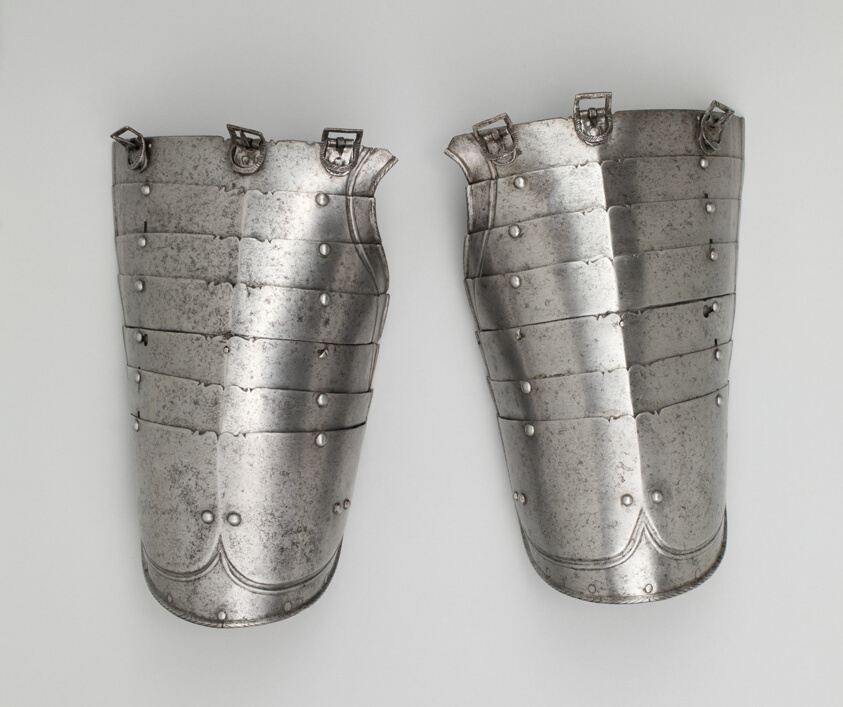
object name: Armor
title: Pair of Tassets for Light Field Use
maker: Northern German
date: c. 1570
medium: Steel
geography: Northern Germany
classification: suit-element; armor; arms and armor